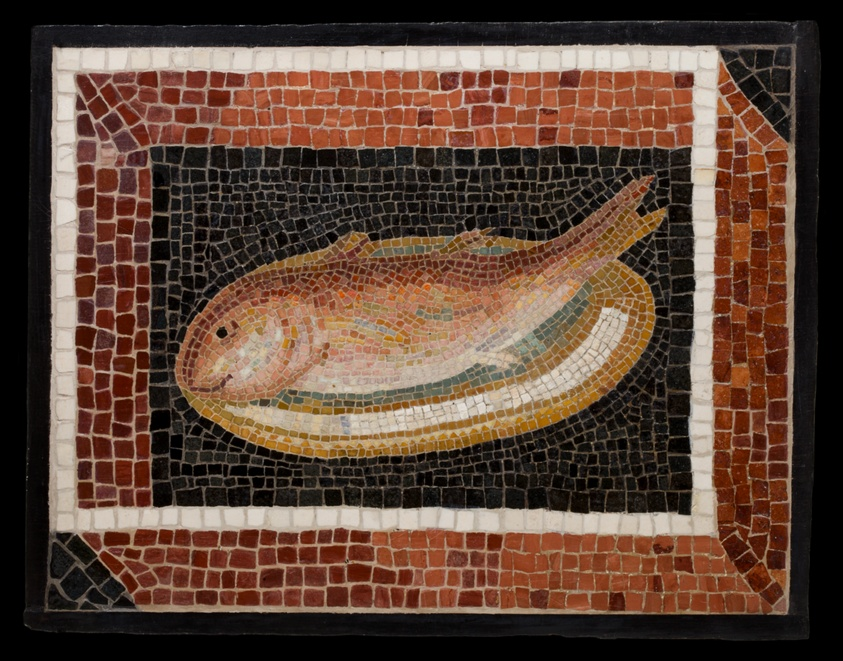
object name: Architectural fragment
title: Mosaic Floor Panel Depicting a Fish on a Platter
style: roman (ancient, style or period), ancient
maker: Roman; Rome, Italy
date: 2nd century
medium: Stone, glass, mortar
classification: architectural fragment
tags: animals, dining, drinking